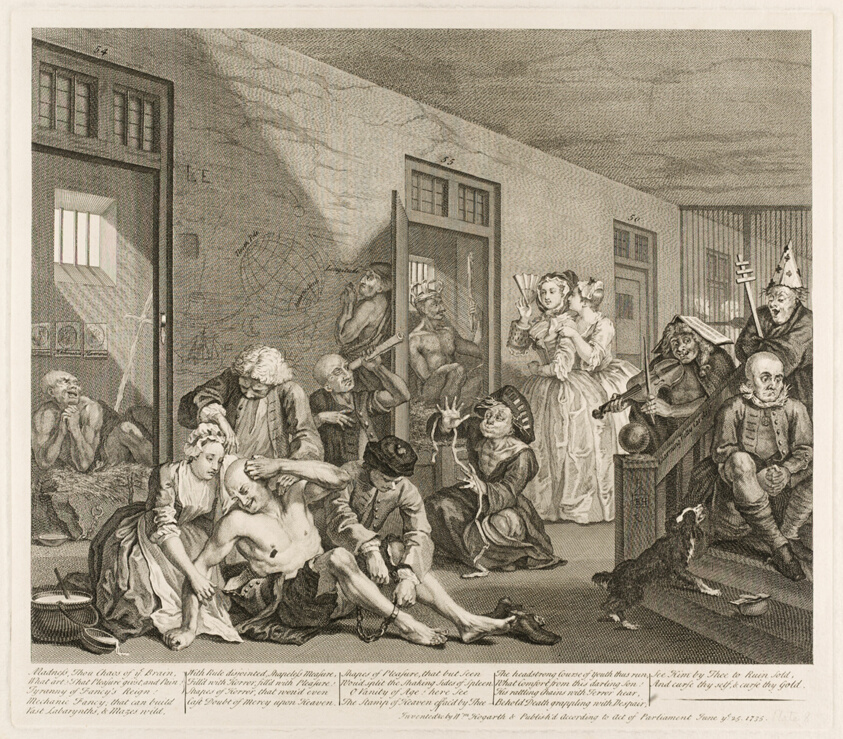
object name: Print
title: Plate Eight, from A Rake's Progress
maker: William Hogarth (English, 1697-1764)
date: June 1735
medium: Etching and engraving in black on ivory laid paper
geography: England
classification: etching; print; prints and drawing